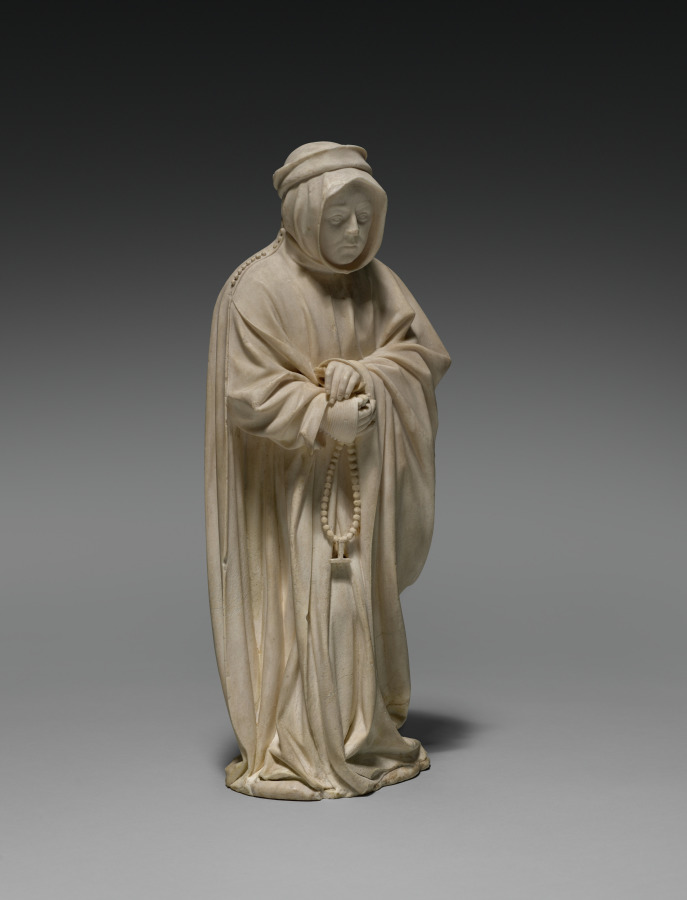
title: Mourner from the Tomb of Philip the Bold, Duke of Burgundy (1364–1404)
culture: Netherlands, active Dijon, 15th century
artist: Claus de Werve (Netherlandish, 1380–1439)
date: 1404–1410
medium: vizille alabaster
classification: Sculpture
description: This figure comes from the tomb of Duke Philip the Bold from the church of Champmol near Dijon (Burgundy, France). Philip, who founded the monastery and designated it as his burial place, hired the best artists, many of whom came from the Netherlands. While the commission was given in 1381, the work was not completed until 1410, six years after the duke’s death. This mourner is unusual for the time because it is not carved as a static low relief on the pedestal of the tomb but interacts with the viewers and their fellow procession members. The lifelike quality of the figure is due in large part to the alabaster. Its softness allowed artists to carve details into the material, and the transparent, milky white stone could also be polished to a high gloss.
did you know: During his life, Duke Philip founded the monastery of Chartreuse de Champmol to serve as a final resting place for himself and his family.